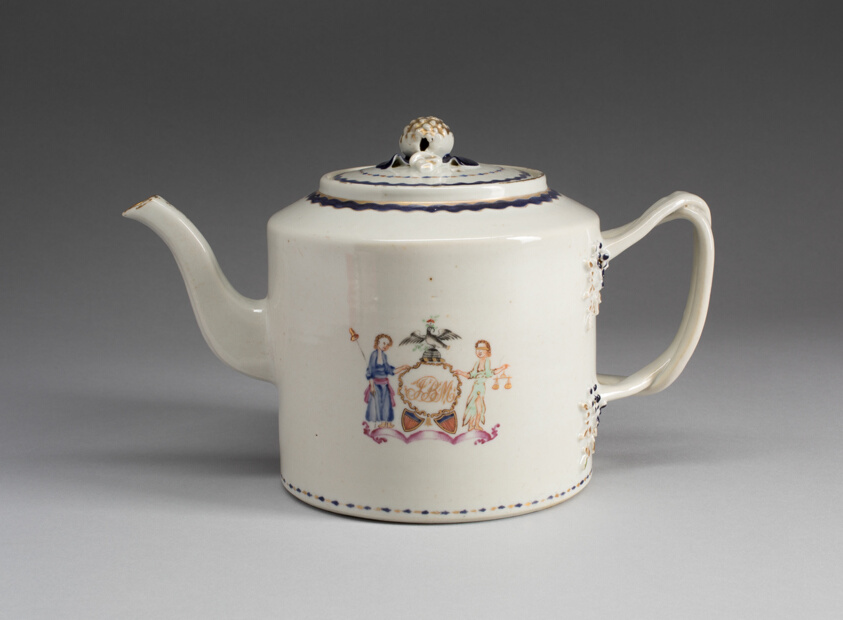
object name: Ceramics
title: Teapot with Cover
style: Chinese (culture or style), asian, chinese export, East Asian, qianlong, 18th Century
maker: China, Qianlong reign; Chinese, made for the American market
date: 1790–1800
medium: Hard-paste porcelain, glaze, with enamels in colors, and gilding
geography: China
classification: teapot; porcelain; art of the americas; ceramics; decorative arts; American market; chinese export porcelain; pottery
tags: cartouches, blindfold, coat of arms, drinking, eagles, globes, Justice, liberty, Monograms, phrygian cap, scales, shields, teapot